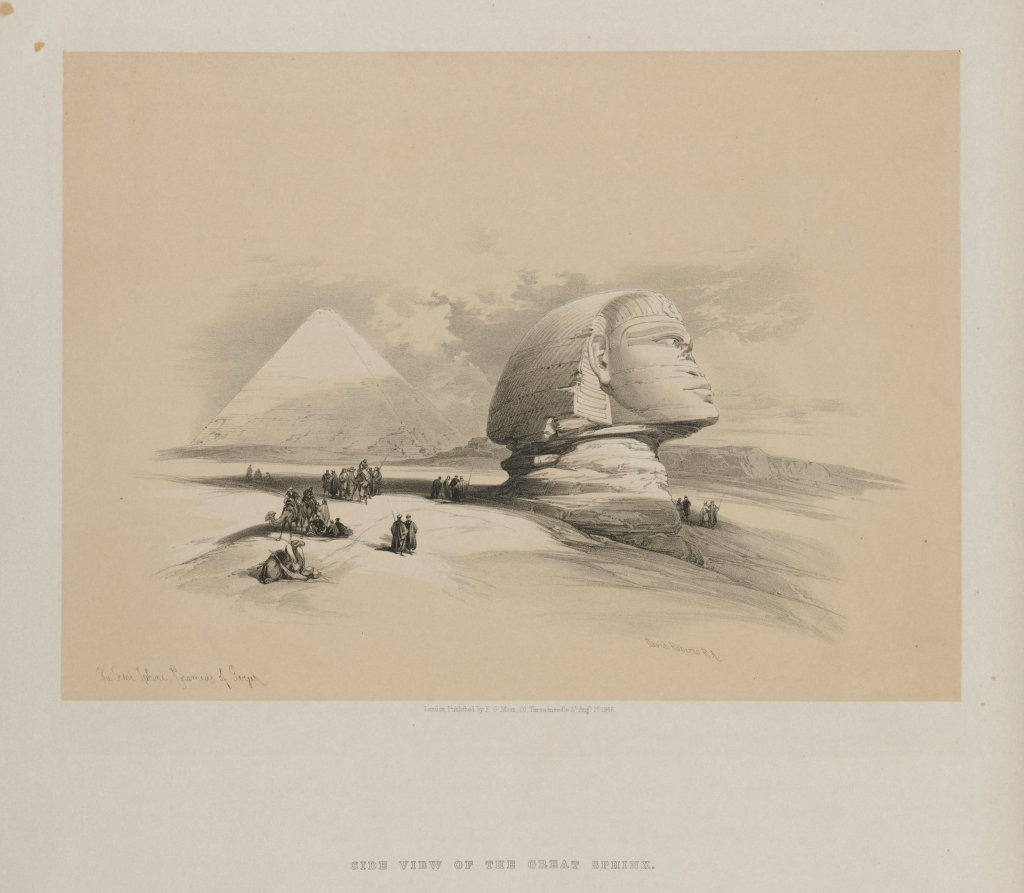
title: Egypt and Nubia, Volume I: The Great Sphinx, Pyramids of Gezeeh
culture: England, 19th century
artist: Louis Haghe (British, 1806–1885)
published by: F. G. Moon, 20 Threadneedle Street, London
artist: after David Roberts (Scottish, 1796–1864)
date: 1846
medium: color lithograph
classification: Print